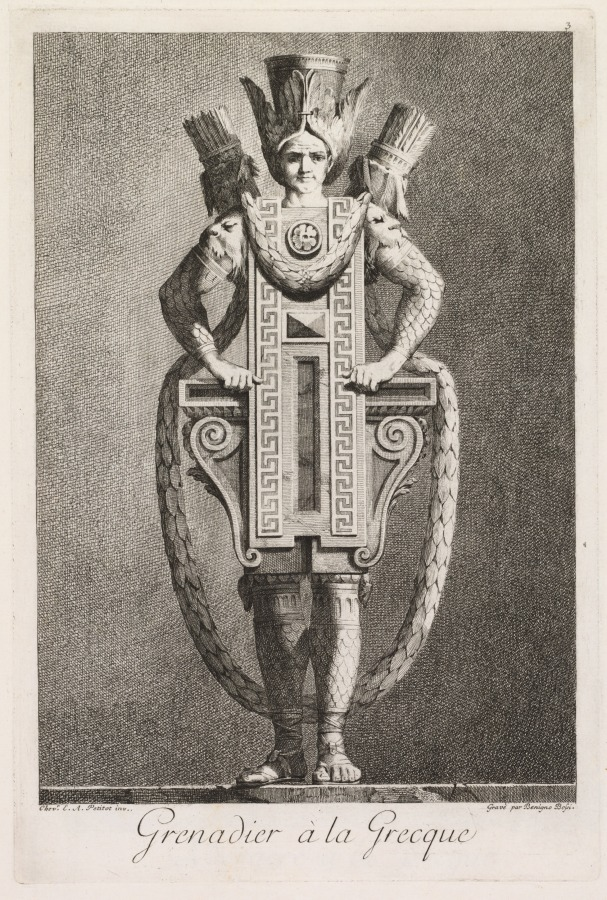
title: Grenadier in the Greek Style, Plate 3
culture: Italy, 18th century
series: Mascarade à la Grecque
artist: Benigno Bossi (Italian, 1727–1792)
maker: after Ennemond Alexandre Petitot (French, 1727-1801)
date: 1771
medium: etching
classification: Print